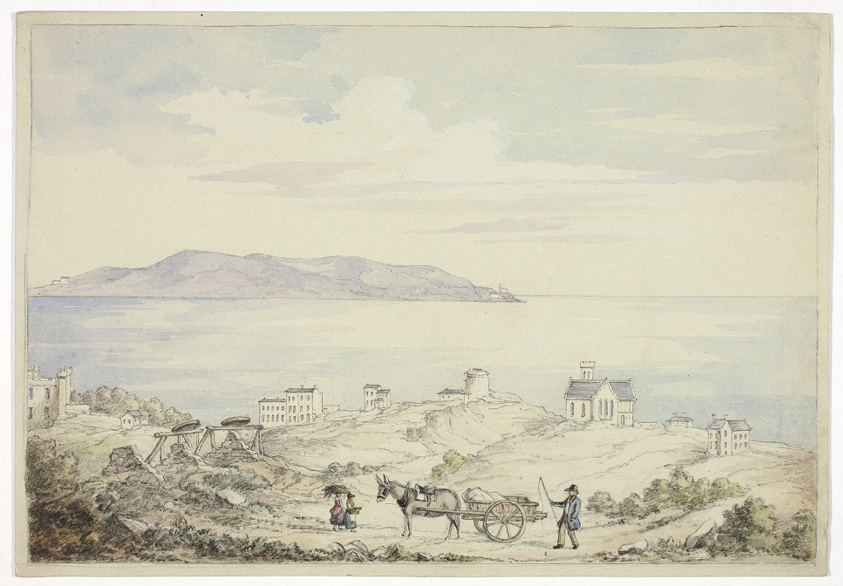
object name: Drawing and Watercolor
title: View of Dalkey from the Road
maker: Elizabeth Murray (English, c. 1815-1882)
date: November 1843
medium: Watercolor with traces of white gouache over graphite on gray wove paper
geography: England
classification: watercolor; drawings (visual works); prints and drawing